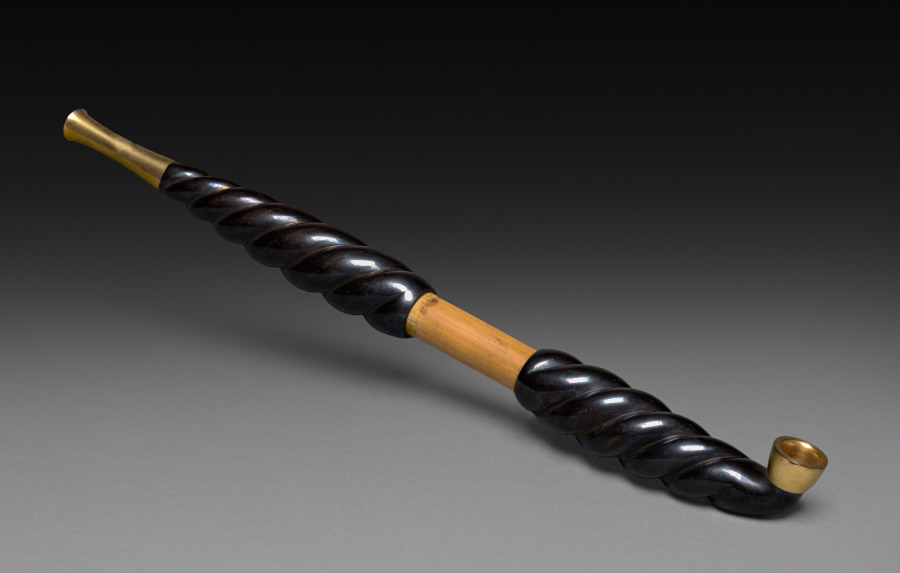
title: Tobacco Pipe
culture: Japan, Edo period (1615–1868)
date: early to mid-1800s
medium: bamboo, brass, and iron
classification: Miscellaneous